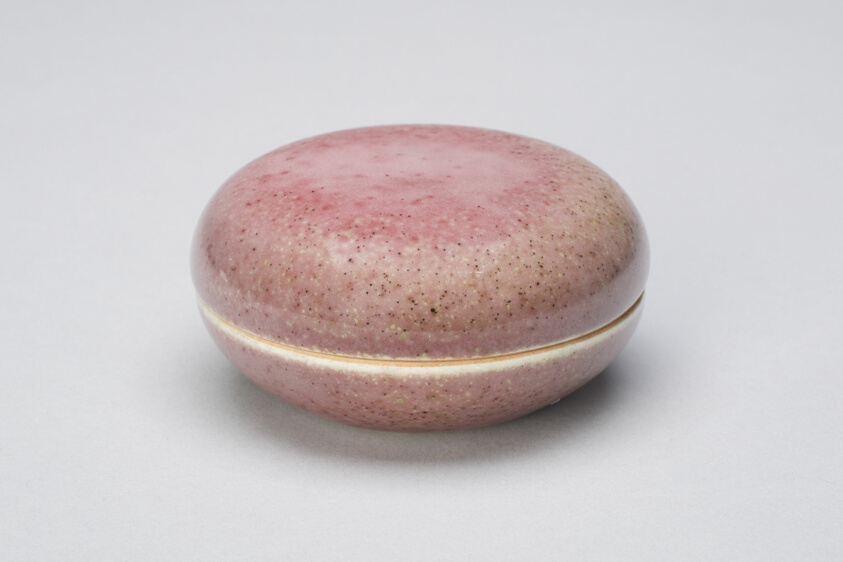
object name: Vessel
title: Box for Seal Paste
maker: China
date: Qing dynasty (1644–1911), Kangxi reign mark and period (1662–1722)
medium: Porcelain with copper-red (peachbloom) glaze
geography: China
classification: porcelain; asian art; ceramics; vessel